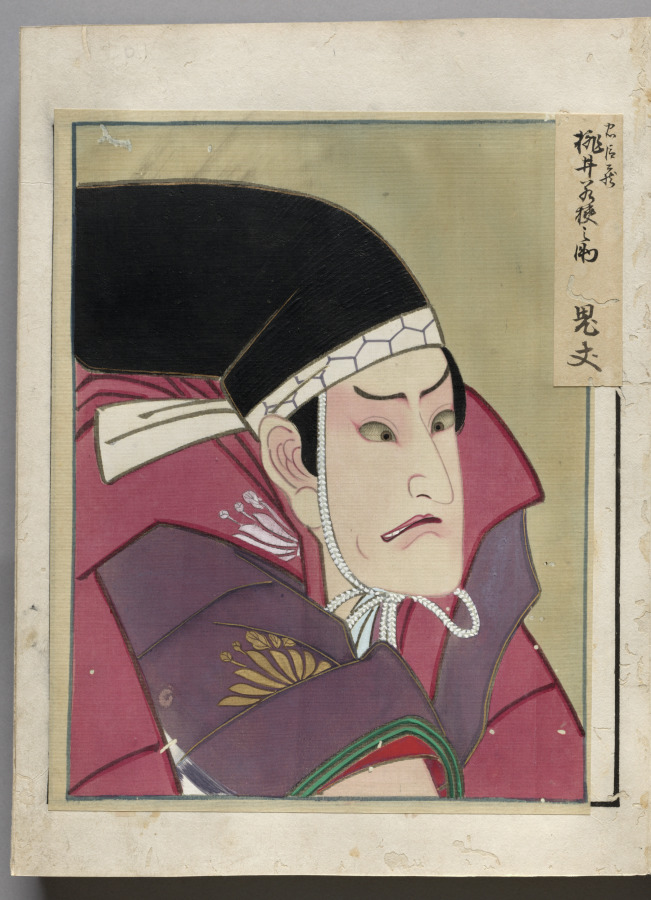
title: Double-Leaf from Album of Actor Portraits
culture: Japan, Edo period (1615–1868)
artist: Shōrakusai (Japanese)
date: c. 1790–1810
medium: double-leaf from an accordion-style album; ink and color on silk (left)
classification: Bound Volume